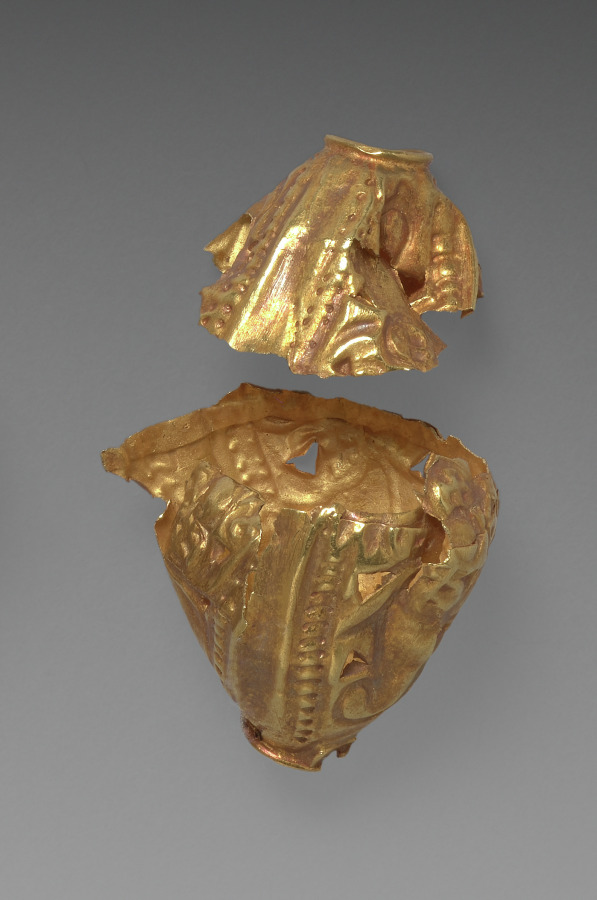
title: Bead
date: after 1519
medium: gold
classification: Jewelry